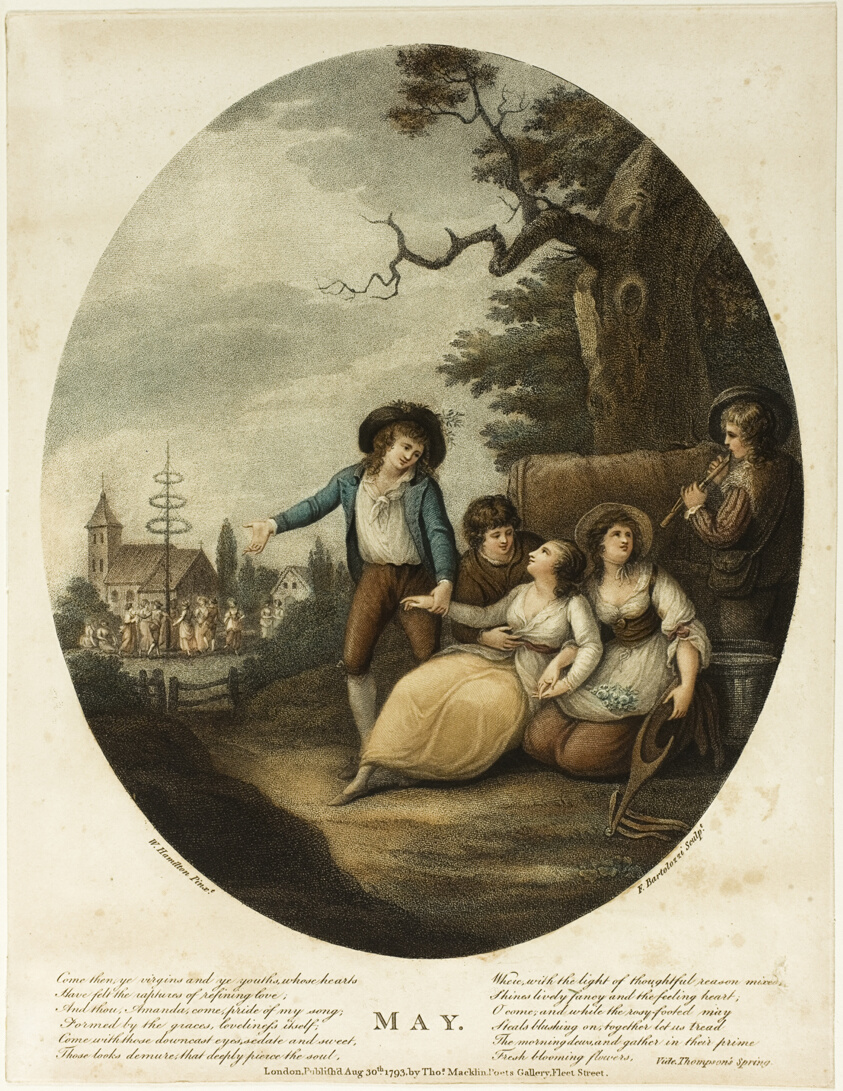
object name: Print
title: May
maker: Francesco Bartolozzi (Italian, 1727-1815); after William Hamilton (English, 1751-1801); published by John and Josiah Boydell (English, 18th century)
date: August 30, 1793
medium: Color stipple engraving on paper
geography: Italy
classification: engraving; print; prints and drawing